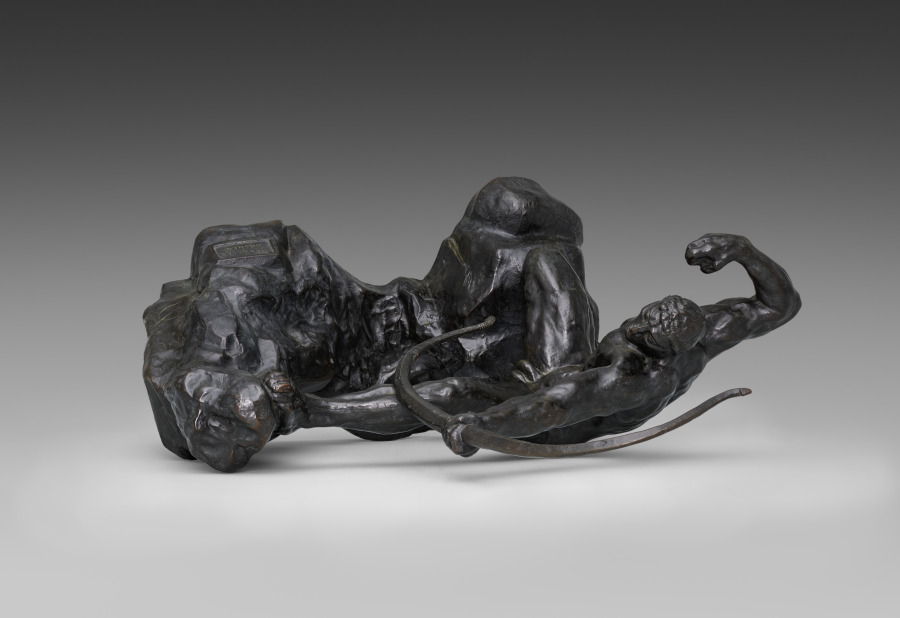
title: Herakles the Archer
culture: France, 19th century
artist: Emile Antoine Bourdelle (French, 1861–1929)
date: 1908–9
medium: bronze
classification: Sculpture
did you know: The model who posed for this sculpture was Major Paul Gustave André Doyen-Parigot, an accomplished sportsman and military commander, who was later killed during World War I in the Battle of Verdun.